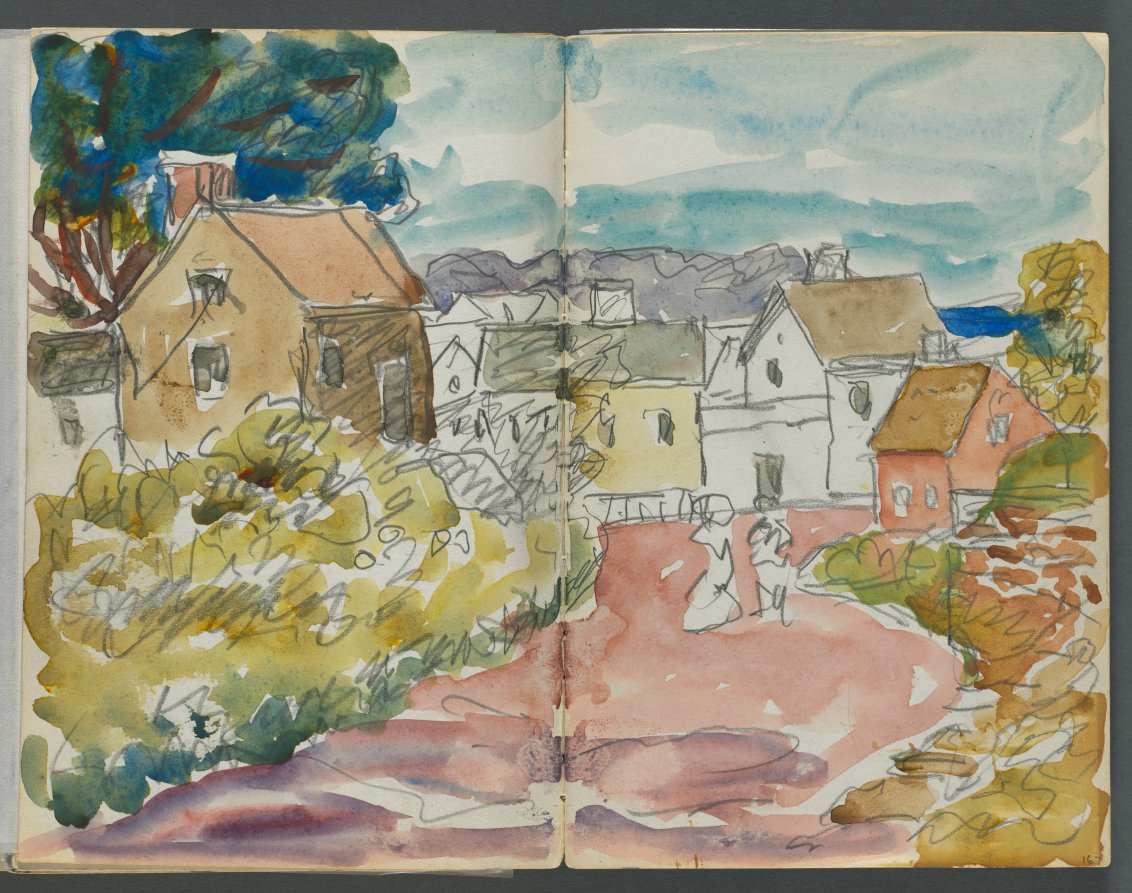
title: Sketchbook, The Dells, N° 127, page 166 & 167: Village with Houses and road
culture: America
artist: Maurice Prendergast (American, born Newfoundland [now Canada], 1858–1924)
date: c. 1919–1921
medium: graphite and watercolor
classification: Bound Volume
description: This sketchbook contains 59 pages of graphite drawings and 16 watercolors made at various locations on Cape Ann, Massachusetts.